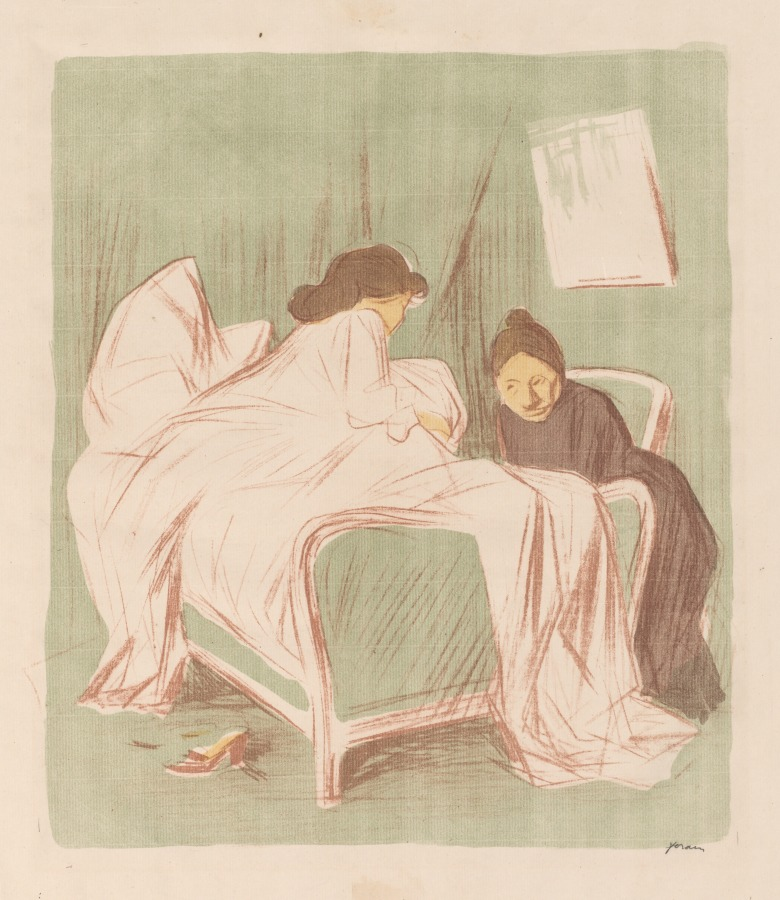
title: Instructions for the Day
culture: France, 19th-20th century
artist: Jean Louis Forain (French, 1852–1931)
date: late 1800s–1900s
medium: lithograph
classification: Print